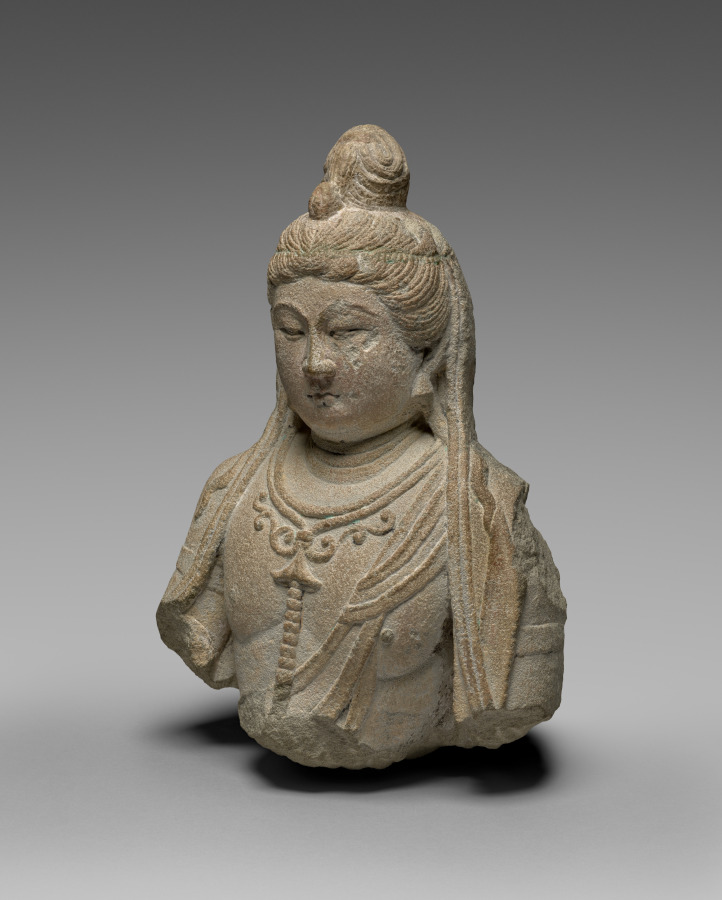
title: Bodhisattva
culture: China, Shanxi province, Taiyuan, Tianlongshan caves, Cave 6, Tang dynasty (618-907)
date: early 700s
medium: light gray limestone with traces of polychromy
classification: Sculpture